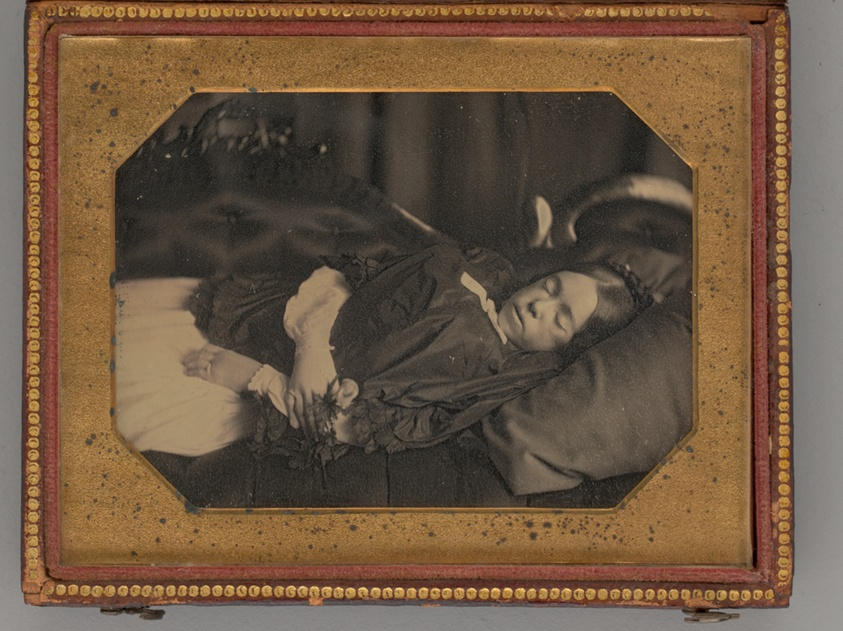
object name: Photograph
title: Untitled (Post Mortem Portrait of a Girl)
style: 19th century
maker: Unknown maker; American, 19th century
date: 1855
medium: Daguerreotype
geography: United States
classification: portrait; photography; photographic process; photograph; daguerreotype; portrait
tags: lundberg collection, post mortem portrait, portraits: female subject, portraits, portrait, photography, female, death, girls